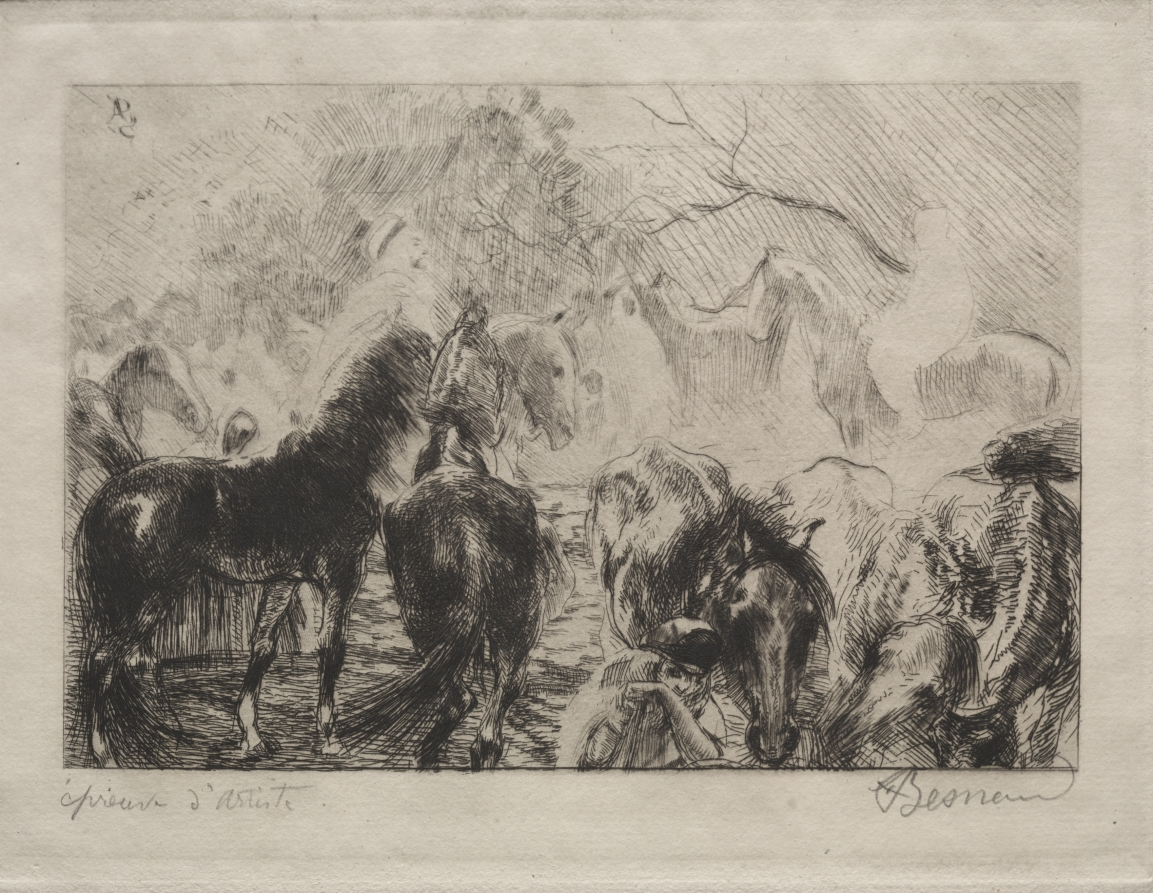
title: Horse Market in Algiers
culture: France, late 19th Century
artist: Albert Besnard (French, 1849–1934)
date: 1898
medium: etching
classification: Print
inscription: lower left, in pencil: épreuve d'artiste signed, lower right, in graphite: A Besnard upper left, in plate: AB